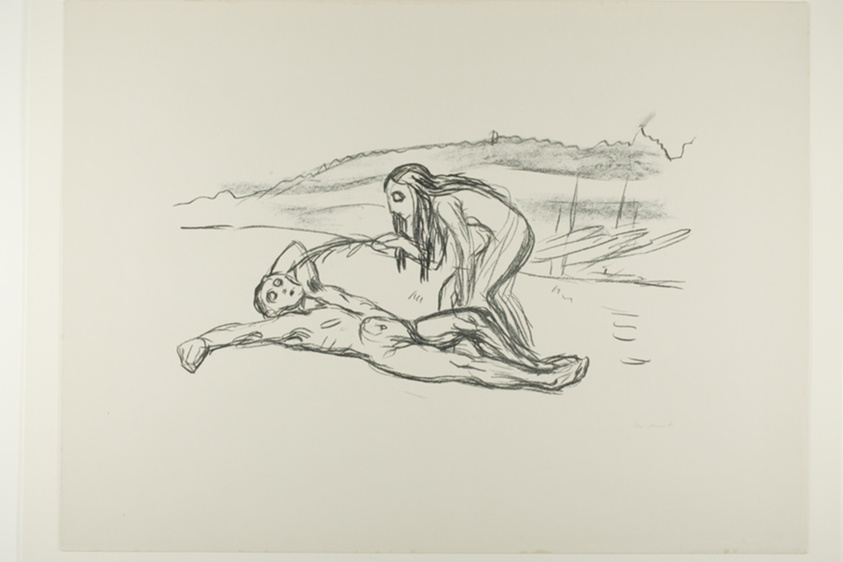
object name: Print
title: Alpha and Omega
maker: Edvard Munch (Norwegian, 1863-1944)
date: 1908/09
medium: Lithograph on paper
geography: Norway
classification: lithograph; print; prints and drawing